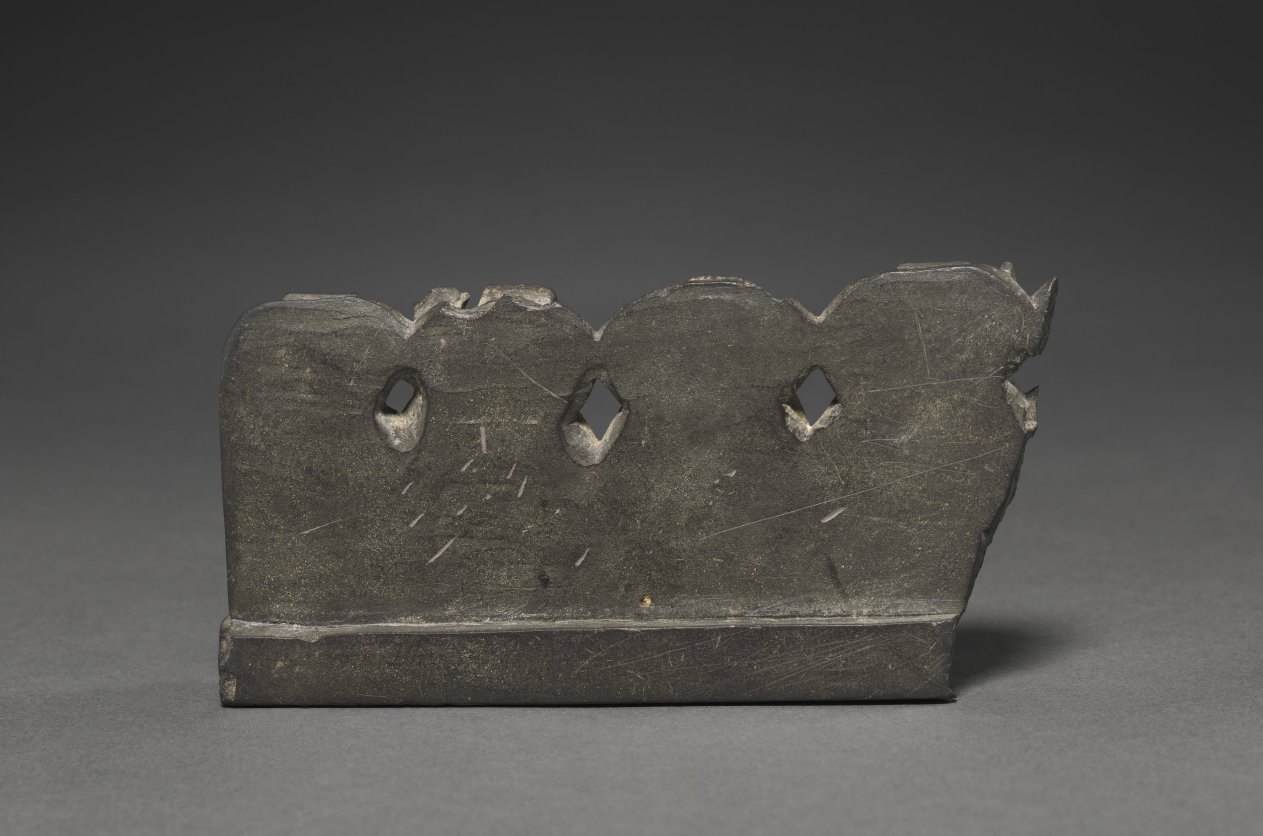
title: Yama as Dharma, the Judge of the Deceased with His Consorts (miniature stele)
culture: Northwest India or Kashmir, 9th century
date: 800s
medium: schist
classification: Sculpture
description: This miniature stele (partially broken on one side) depicts the God of Death, Yama, flanked by his consorts. Yama is depicted in his aspect as the Judge of the Deceased, Dharma, which is suggested by the balance he holds in his hands with two figures on each extreme of the scale. His consorts each carry a bowl and a different type of spear. He was probably originally surrounded by four of them, two on each side, but only three now remain.